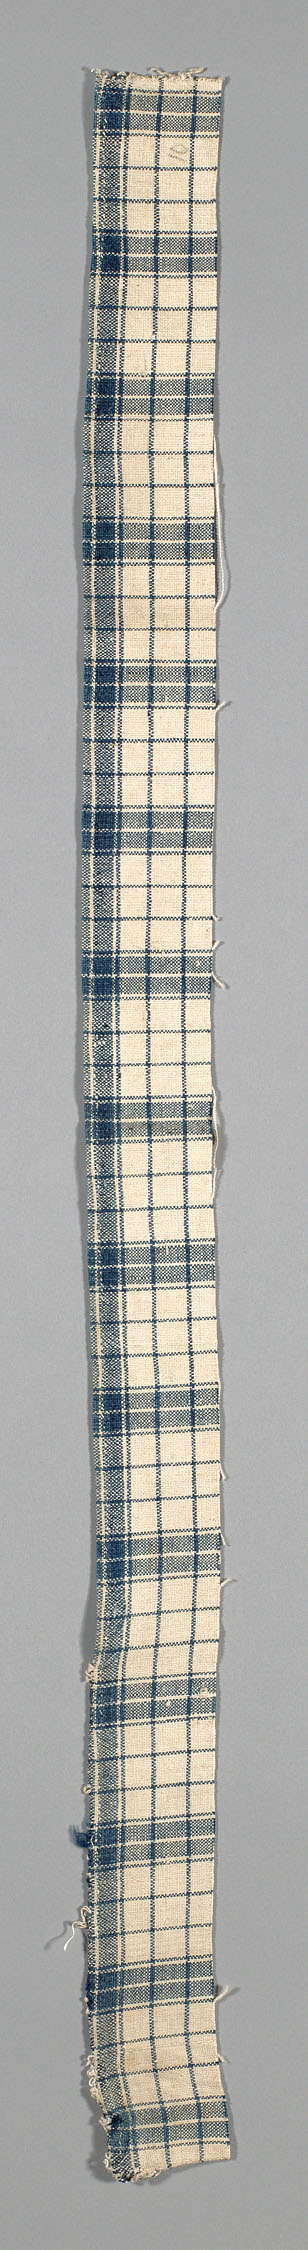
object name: Textile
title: Fragment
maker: United States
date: early 19th century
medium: Sample of stripe and check patterns of blue, white and tan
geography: United States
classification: textile; weaving